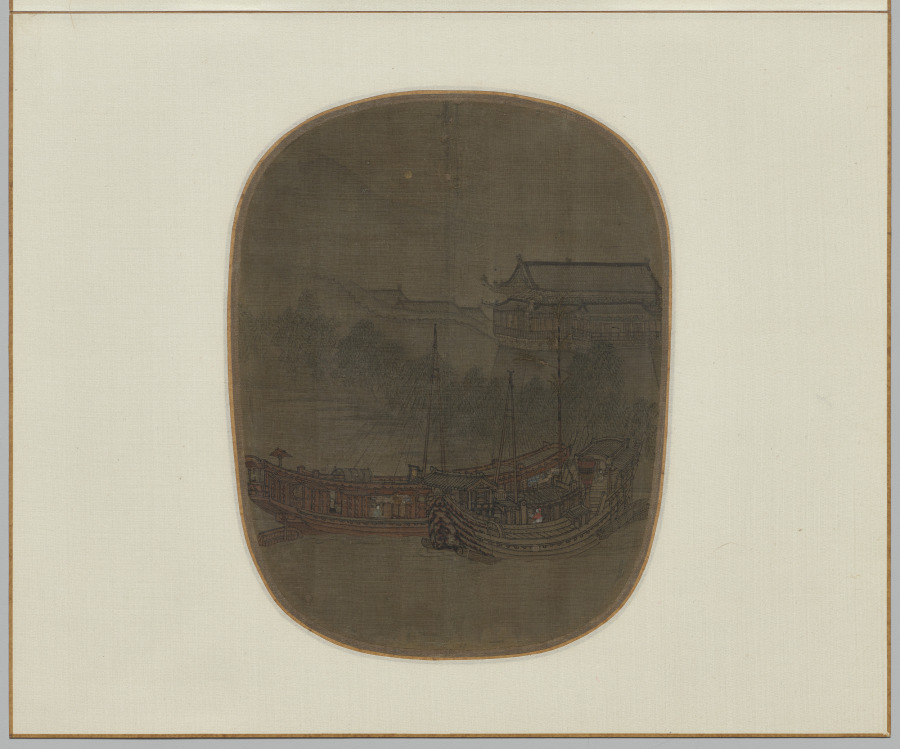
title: Boats at Anchor on West Lake at the City Gate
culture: China, Southern Song dynasty (1127-1279)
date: 1150–1200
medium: Album leaf; ink and color on silk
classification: Painting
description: Highlighted with a few bright accents, this fan painting conveys a nightly atmosphere with boats anchoring on West Lake at the foot of the city walls. Willow trees line the embankment, and the moon appears above the mountains. While the city is asleep, a figure wearing red inside a boat holds what appears to be a pipa (plucked stringed instrument), while a blue-robed gentleman nearby gazes toward the sound of music, evoking an association with Song of the Lute (Pipa xing) by Tang poet Bai Juyi (772–846) which tells the story of a romantic encounter on the Yangzi River.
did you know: The depiction of the female figure playing the pipa and the scholarly male evokes an association with a romantic encounter narrated in a well-known Tang dynasty poem.